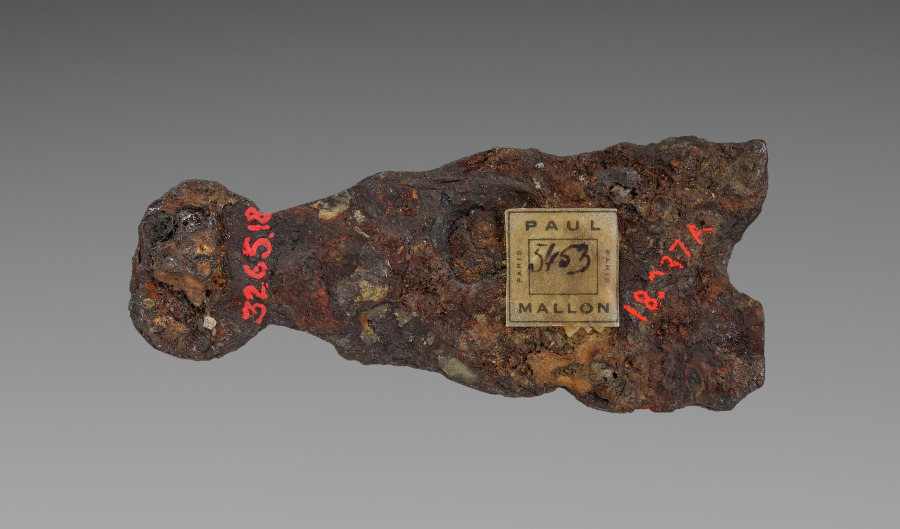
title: Buckle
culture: Merovingian, Burgundian, Migration period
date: 600s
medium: iron with silver overlay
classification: Jewelry